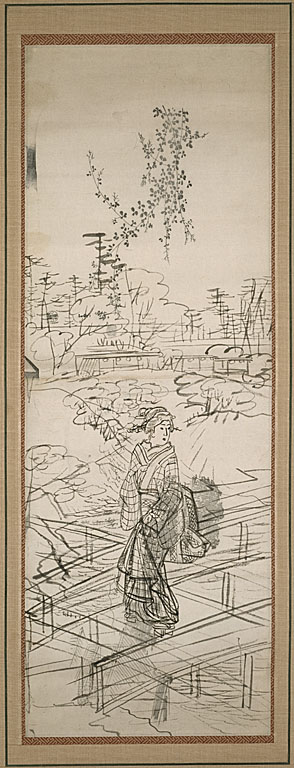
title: Sketch of woman crossing bridge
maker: Utagawa Hiroshige 歌川 広重 (Japanese, 1797-1858)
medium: Ink on paper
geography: Japan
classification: hanging scroll; painting; asian art